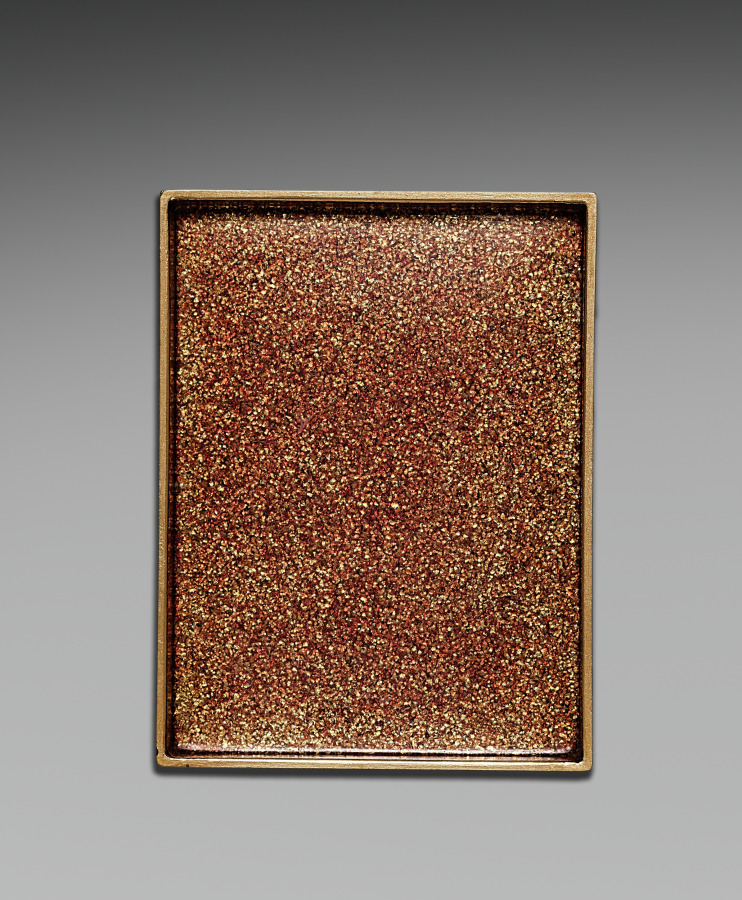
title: Nested Boxes with Chrysanthemums (inner box)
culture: Japan, Meiji period (1868–1912) or Taishō period (1912–26)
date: early 1900s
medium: lacquer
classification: Lacquer